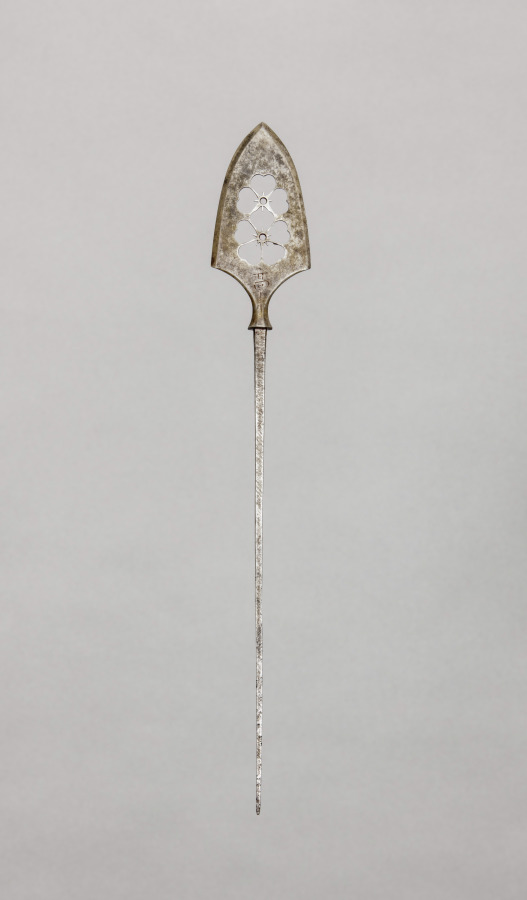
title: Arrow Point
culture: Japan, Edo period (1615–1868)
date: 1700s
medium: steel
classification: Arms and Armor